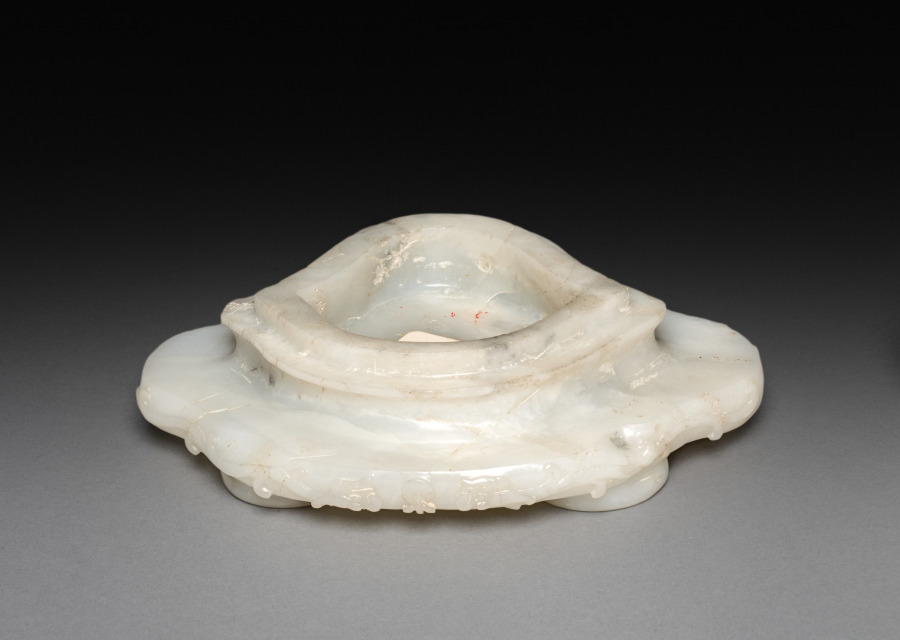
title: Three-Sectional Altar Group: Koro (upper section of base)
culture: China, Qing dynasty (1644-1911)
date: 1644–1911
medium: jade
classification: Jade